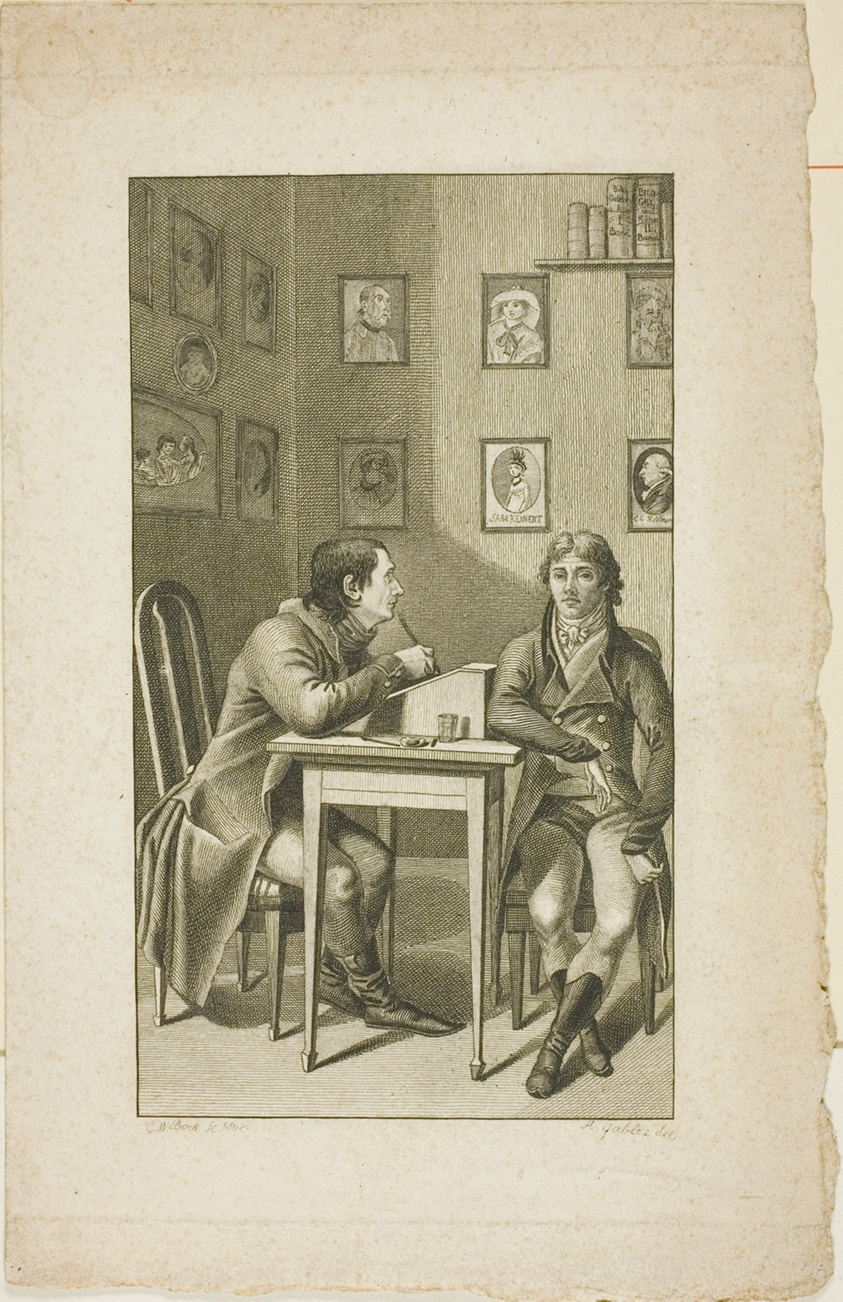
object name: Print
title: A Physionotrace Portraitist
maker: Christoph-Wilhelm Bock (German, born 1754/55); after Ambrosius Gabler (German, 1762-1834)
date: 1802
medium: Engraving on buff wove paper, matted together with photograph of ticket for physionotrace sitting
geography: Germany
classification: engraving; print; prints and drawing